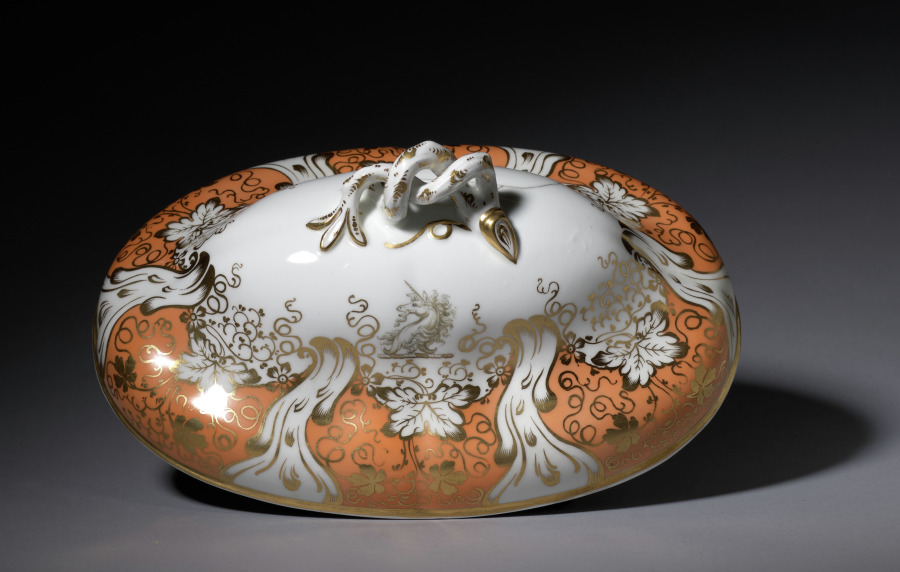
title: Vegetable Dish (lid)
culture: England, Staffordshire, early 19th century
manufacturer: Davenport Pottery and Porcelain Factory (British)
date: early 1800s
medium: ceramic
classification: Ceramic